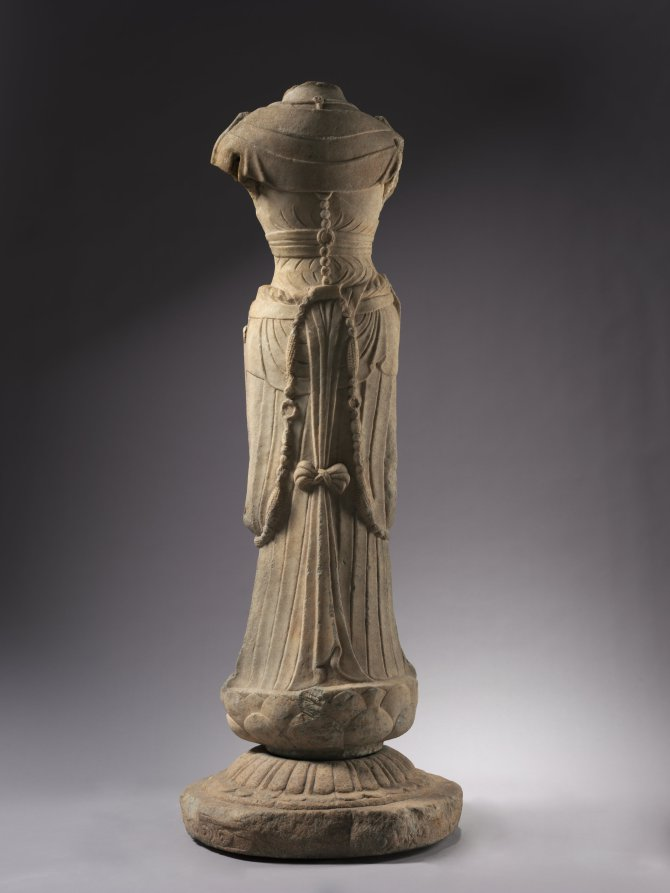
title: Bodhisattva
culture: China, Hebei province, Tang dynasty (618-907)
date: 700s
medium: white marble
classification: Sculpture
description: The bodhisattva is an enlightened being dedicated to the spiritual awakening of all beings. This white marble torso exemplifies the quest for refinement and plasticity of form that mark the golden era of Tang Chinese Buddhist sculpture. The statue was conceived with great power and grandeur. The slight sway of the hip on one side and upraised shoulder on the other result in an elegant S-curve. Emphatic lines cut into the stone create a sense of rhythm and reveal the sculptor’s skill and sureness of execution.